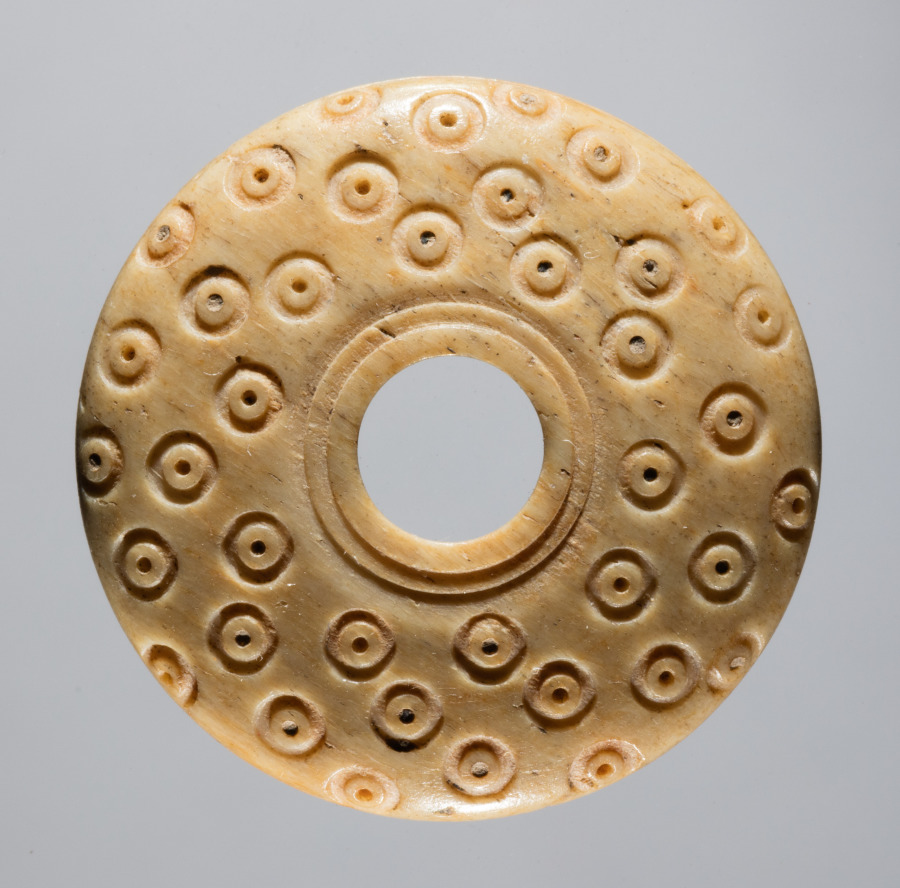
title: Spindle Whorl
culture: Iran, early Islamic period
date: 700s - 900s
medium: bone, incised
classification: Spindle Whorl